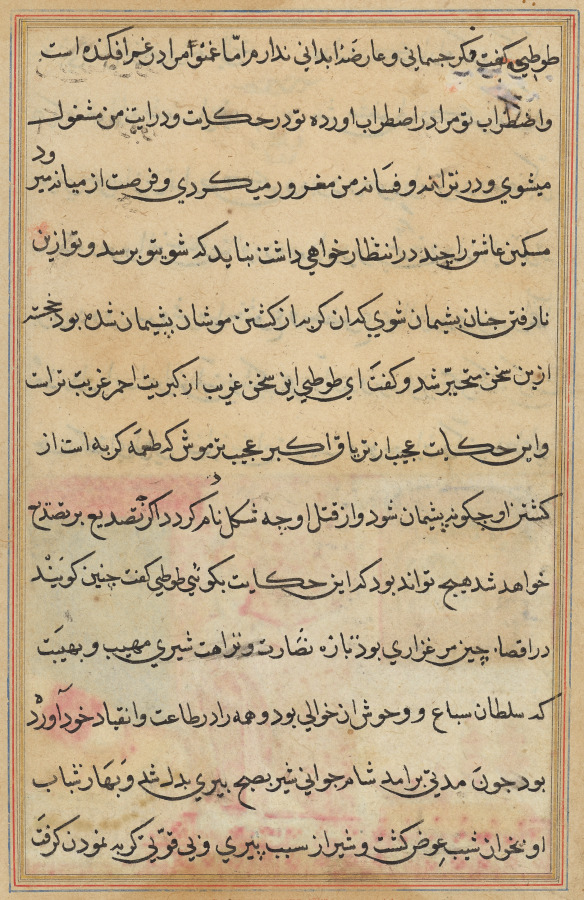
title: Page from Tales of a Parrot (Tuti-nama): text page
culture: Mughal India, court of Akbar (reigned 1556–1605)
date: c. 1560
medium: gum tempera, ink, and gold on paper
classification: Painting